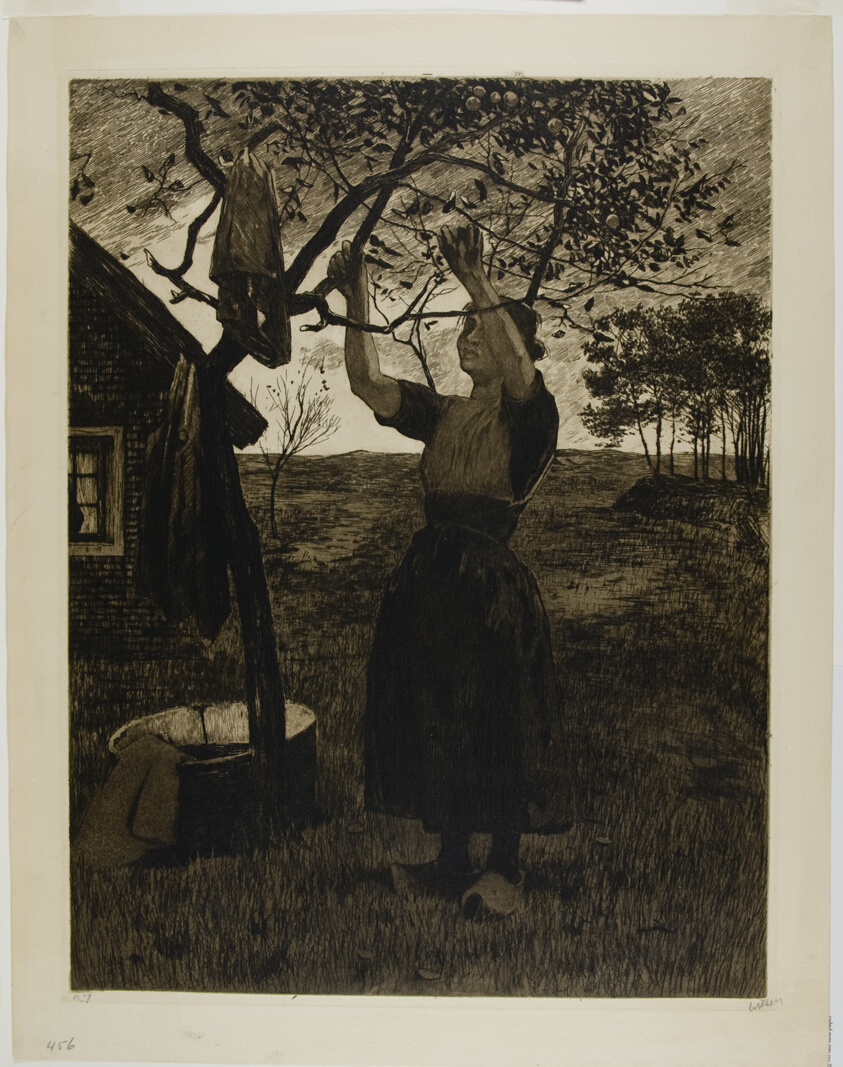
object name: Print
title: The Apple Tree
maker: Willem Witsen (Dutch, 1860-1923)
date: c. 1885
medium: Etching on tan laid paper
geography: Holland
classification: etching; print; prints and drawing